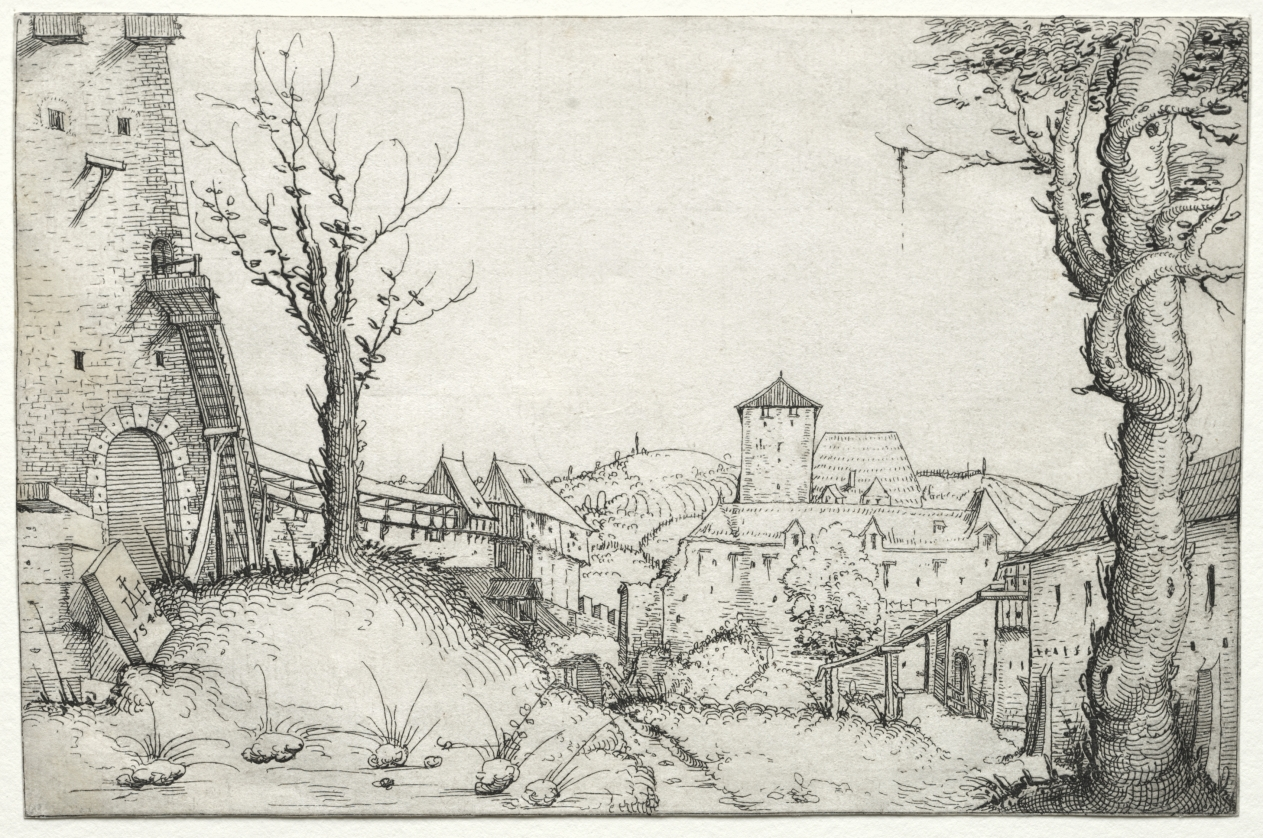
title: Courtyard of a castle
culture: Germany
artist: Augustin Hirschvogel (German, 1503–1553)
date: 1546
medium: etching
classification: Print